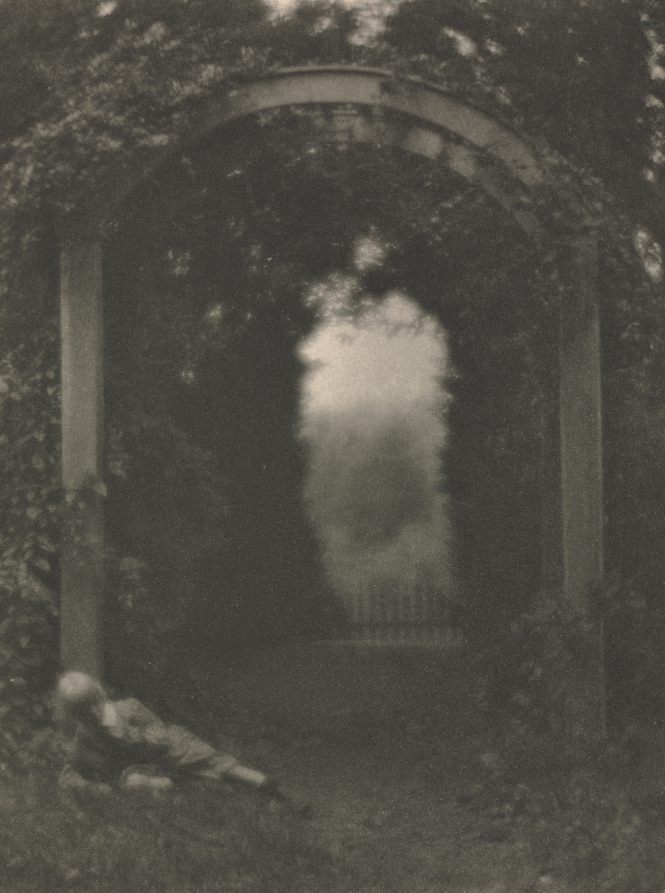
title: Camera Work: Entrance to the Garden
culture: America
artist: Clarence H. White (American, 1871–1925)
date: 1908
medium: photogravure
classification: Bound Volume